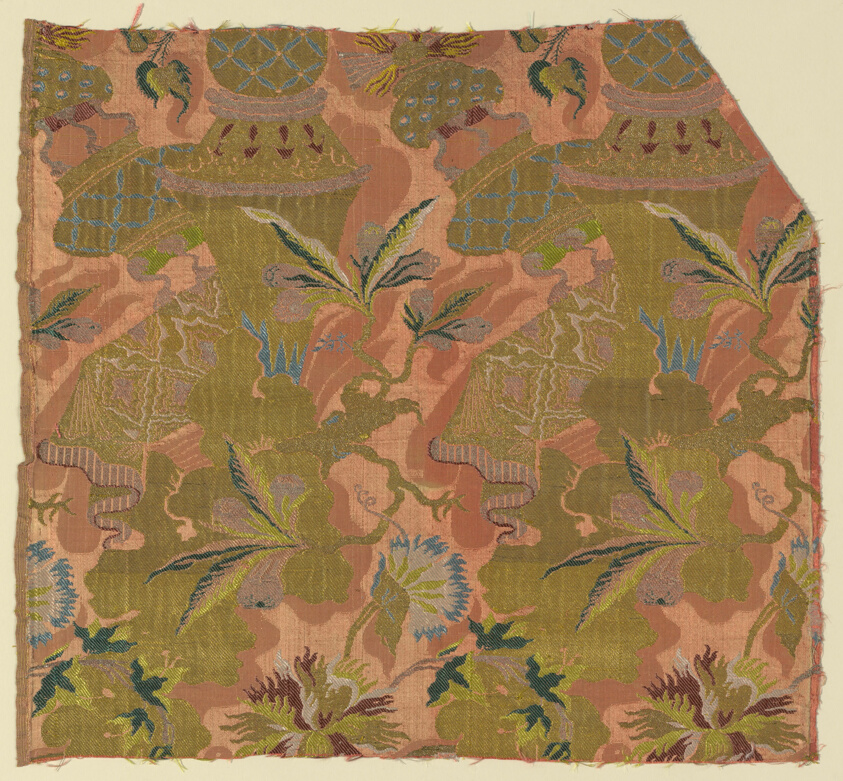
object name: Textile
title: Fragment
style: "bizarre" style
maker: France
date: c. 1705/06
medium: Silk, gilt-and-silvered-metal-strip-wrapped silk, warp-float faced 7:1 satin weave with supplementary patterning wefts, supplementary brocading wefts, and self-patterned by areas of plain weave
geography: France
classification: textile; weaving